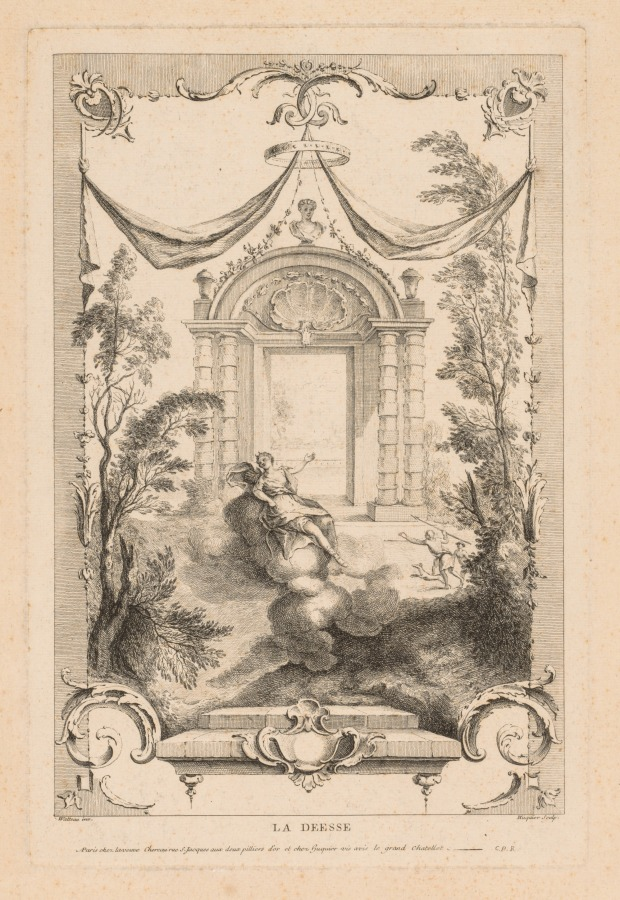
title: The Goddess, Diana on the Clouds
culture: France, 18th century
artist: Gabriel Huquier (French, 1695–1772)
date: c. 1730–70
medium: engraving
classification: Print